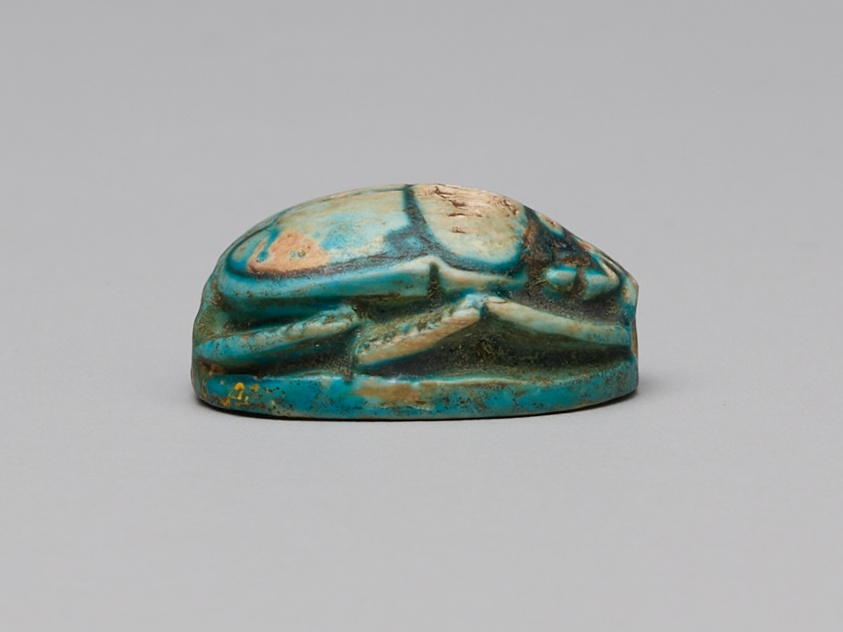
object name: Costume and Accessories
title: Scarab Depicting Ptah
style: new kingdom, ramesside period, ancient, nineteenth dynasty, egyptian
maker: Egyptian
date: New Kingdom, Dynasty 19, Reign of Ramesses II (about 1279–1213 BCE)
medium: Glazed steatite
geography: Egypt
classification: scarab; ancient art; costume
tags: scarab beetle, pharaohs, kings, king, Hieroglyphs, gods (deities), deities